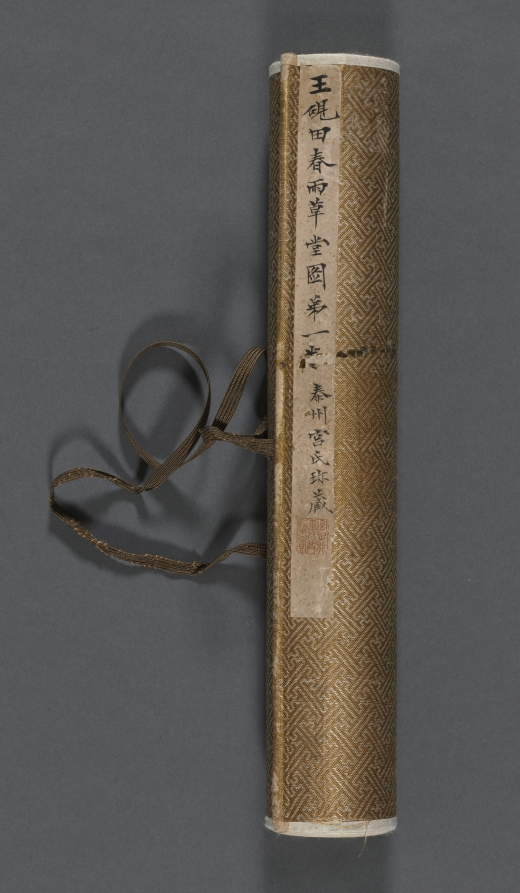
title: Spring Rain Thatched Hut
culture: China, Qing dynasty (1644-1911)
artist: Wang Jianzhang (Chinese, active 1621–1662)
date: 1650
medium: handscroll, ink on paper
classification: Drawing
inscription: Title by Wu Zhiying 吳芝瑛 (1868–1933), dated 1910.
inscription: 春雨草堂圖。庚寅仲春，為紫玄社兄畫於若耶溪上。 仲初王建章。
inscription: 12 colophons by Gong Weiliu’s 宮偉鏐 (1611–1680) contemporaries: Fang Gongqian 方拱乾 (1596–1667, jinshi of 1628); Jiang Cai 姜埰 (1607–1673); Liang Yizhang 梁以樟 (1608–1665); Du Shaokai 杜紹凱 (also named Du Jie 杜岕, 1617–after 1689), dated 1648; Zhao Kaixin 趙開心 (d. 1663), dated 1647; Zhao Erbian 趙而忭 (d. 1658); Yu Yaoguang 余耀光, dated 1649; Yao Quan 姚佺, dated 1648; Chen Taisun 陳台孫 (b. 1611, jinshi of 1640); (Monk) Shao 韶; Du Zhujin 杜祝進; and Tang Shi 唐時.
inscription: 此研田莊居士王建章為先太史紫元公所作春雨草堂圖也。居士字仲初，明崇禎間人，與先太史及惲香山相友善。喜畫佛像，自謂不讓李公麟。山水祖述董源，筆力雄健，有不可羈勒之概。香山稱其墨有五采，非世人所知。然性廉重，非同志不輕落筆，人得其寸圖尺縑，必相與忻賞，如獲蜼彝兕敦，非人世間物也！見先太史筆記，此圖寫雨景，而氣韻生動，勃勃於不能止。每一展覽，覺滿紙雲烟，墨瀋猶濕，如寫吾先人胸中未盡之邱壑也。圖後題詠，多一時名手，想見文采風流之盛。迄今二百餘年，舊德先疇，遺風未沫。吾子孫其永寶之，如與吾先人接謦咳於一堂，為感思之助，其敢作圖畫觀乎！同時香山亦有圖佚去己久，不知異日能為延津之合否。壬申長夏本昂重裝敬識。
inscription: Collectors' seals including: Gong Ben'ang 宮本昂 (1821–1874); Lian Qian 廉泉 (1868–1932); Wu Zhiying 吳芝瑛 (1868–1933)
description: With its striking simplicity, this painting captures the pure serenity of a private garden in the moist atmosphere of a spring morning on a small river. Painted in the style of Ni Zan, Wang Jianzhang dedicated this work to his patron-friend Gong Weiliu (1611-1680). Gong retired from government service after the fall of the Ming dynasty and constructed a garden-retreat at his native home in Taizhou, Jiangsu province. He invited scholars and poets from his literary society to contribute writings of his estate, which are here mounted together with the painting in this scroll.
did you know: Gong Weiliu, the owner of the estate portrayed here, had received his prestigious jinshi degree in 1643, but his official career was thwarted by the collapse of the Ming dynasty the following year.